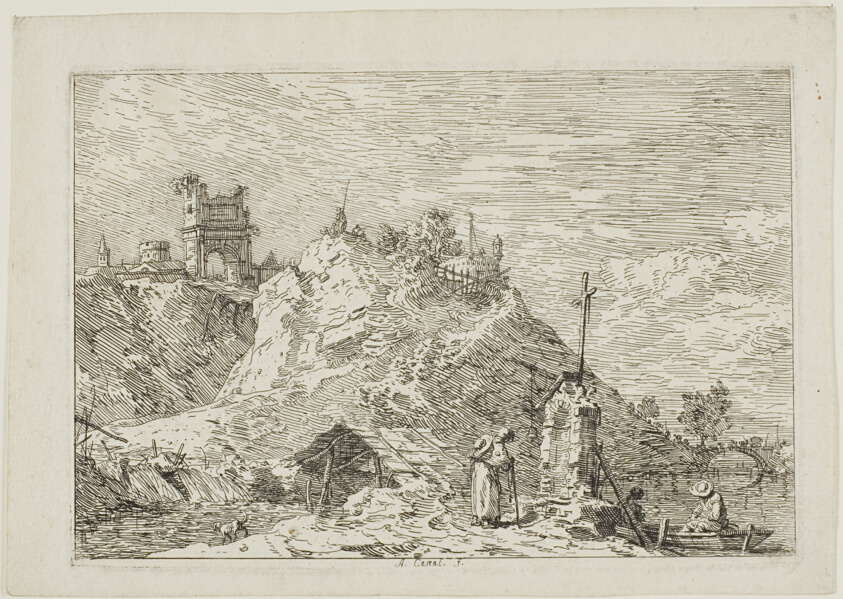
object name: Print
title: Landscape with the Pilgrim at Prayer, from Vedute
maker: Canaletto (Italian, 1697-1768)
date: 1735/44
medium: Etching in black on ivory laid paper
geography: Italy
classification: etching; print; prints and drawing